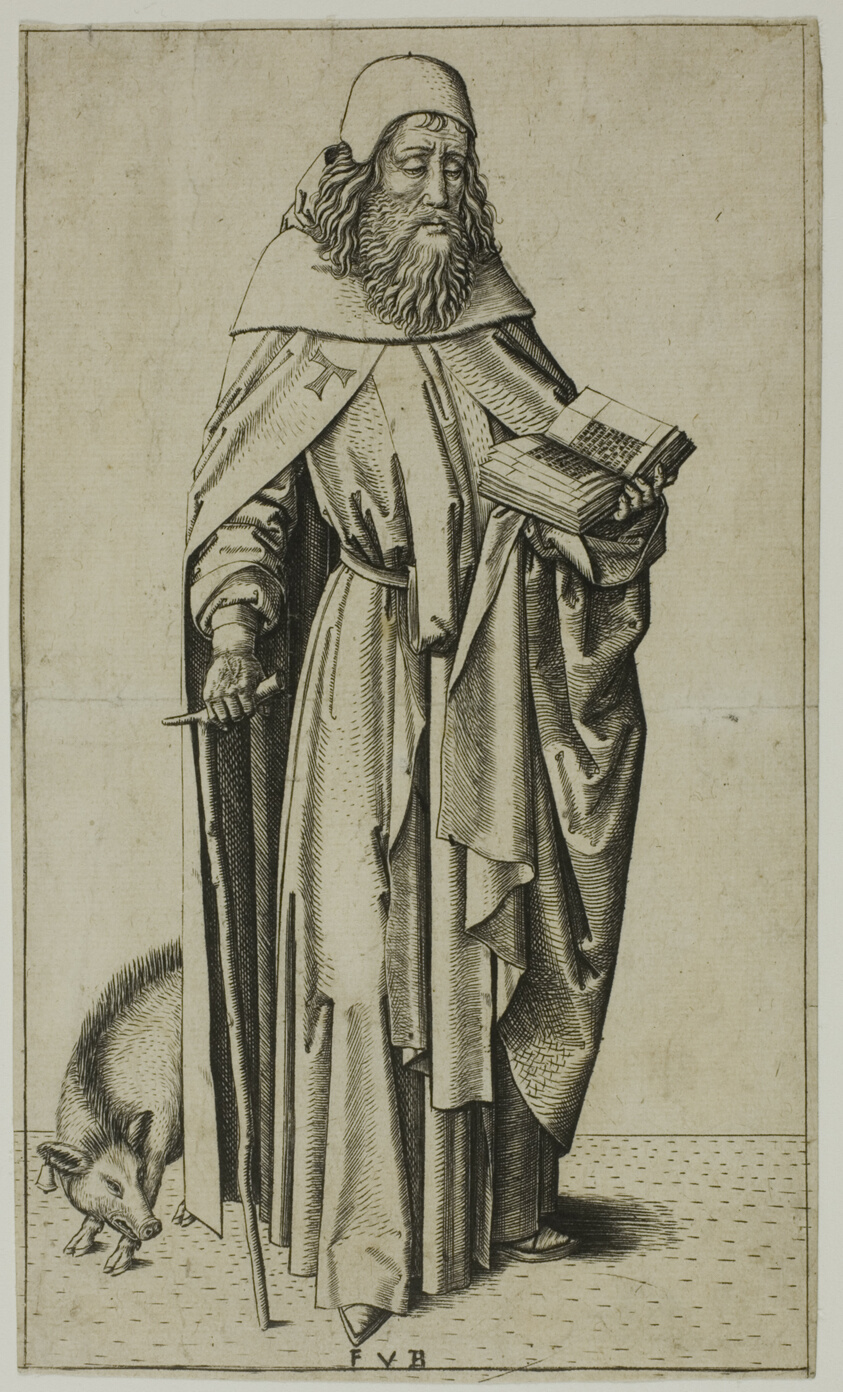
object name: Print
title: St. Anthony the Hermit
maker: Master F.V.B. (Netherlandish, active 1475-1500)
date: 1490/1500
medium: Engraving on paper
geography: Bruges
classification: engraving; print; prints and drawing